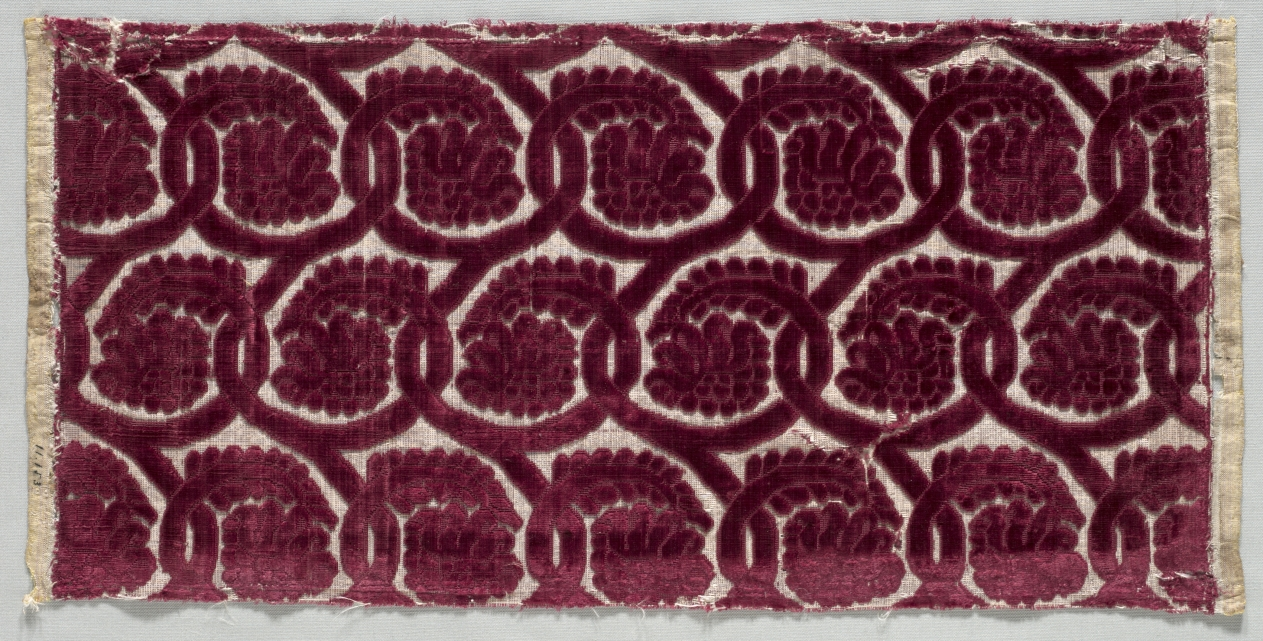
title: Velvet Strip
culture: Italy, 17th century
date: 1600s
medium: velvet (cut and uncut); silk and metal thread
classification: Velvet